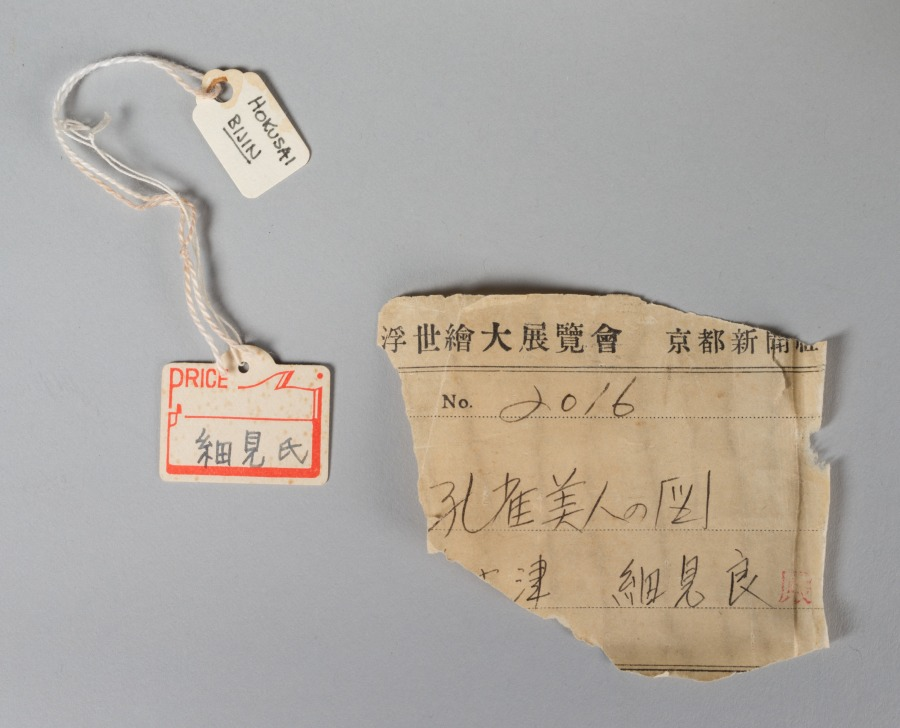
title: Beauty (Bijin)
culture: Japan, Edo period (1615–1868)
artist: Katsushika Hokusai (Japanese, 1760–1849)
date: c. 1775–1849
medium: hanging scroll; ink and color on paper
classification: Painting